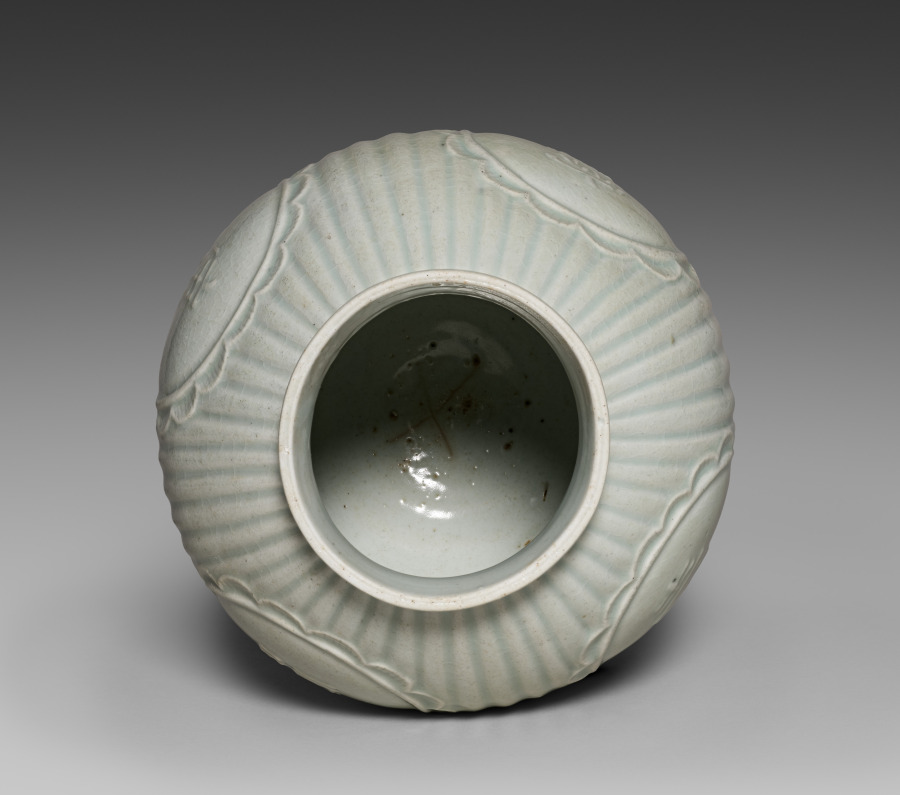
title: Jar with Four Auspicious Characters in Relief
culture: Korea, Joseon dynasty (1392–1910)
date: 1800s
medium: glazed porcelain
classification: Ceramic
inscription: longevity 壽, happiness 福, health 康, and peace 寧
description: This white porcelain vase is decorated with four Chinese characters symbolizing auspicious (hopeful) wishes—longevity, good fortune, health, and peace—each within a floral medallion. Such jars were often presented as birthday or wedding gifts, conveying the giver’s blessings for a long and harmonious life. This object was purchased in 1981 from Kochukyo (壺中居), an antique gallery founded in 1924 in Tokyo, Japan. Many important Korean works remain in Japanese private collections, after being taken there during the Japanese colonial period (1910–45). Consequently, Japanese antique galleries continue to handle Korean antiquities, serving as significant channels for their circulation today.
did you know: This type of jar with auspicious characters was often used as a birthday or wedding gift.